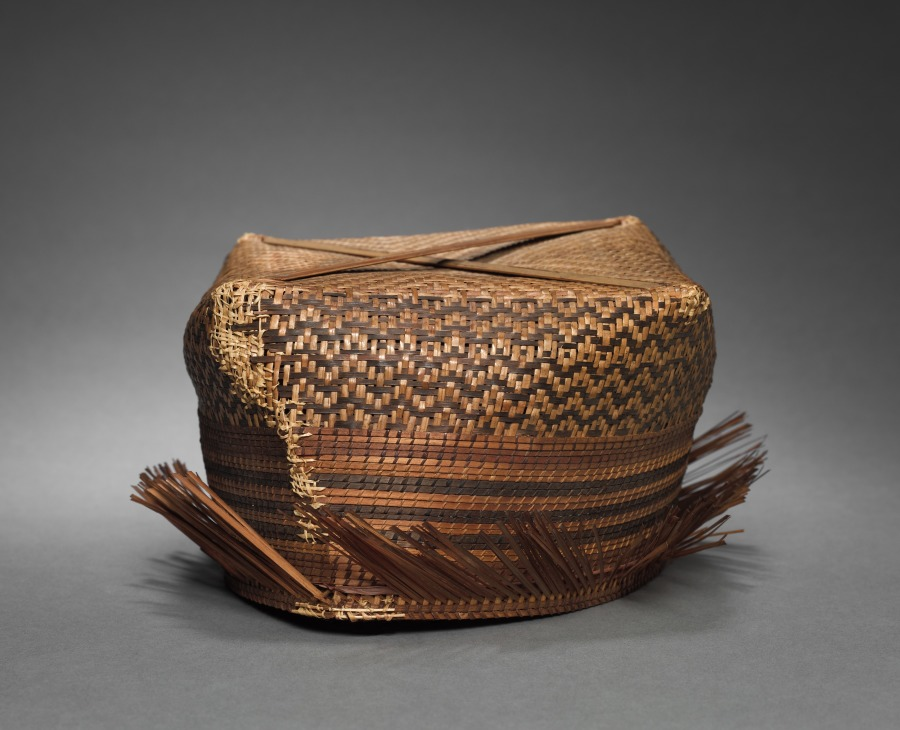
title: Hat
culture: Africa, Central Africa, Democratic Republic of the Congo, Mangbetu-style maker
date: before 1929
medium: Plant fibers and dye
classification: Garment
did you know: This woven hat looks brand new because it was one of the many items the business-savvy chief of Ekibondo had artists and artisans make for the foreigners who passed through his village.